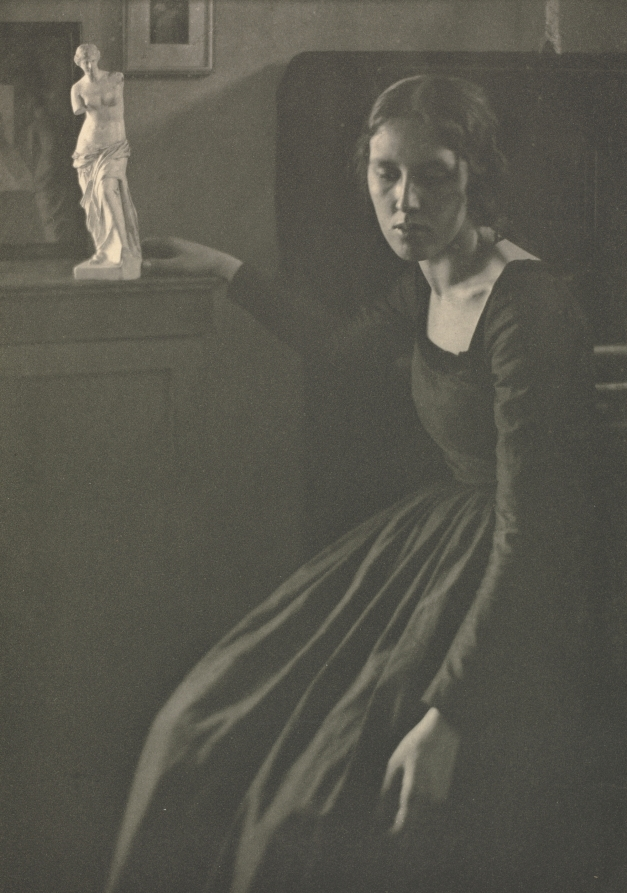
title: Camera Work: Lady in Black with Statuette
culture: America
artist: Clarence H. White (American, 1871–1925)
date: 1908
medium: photogravure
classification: Bound Volume